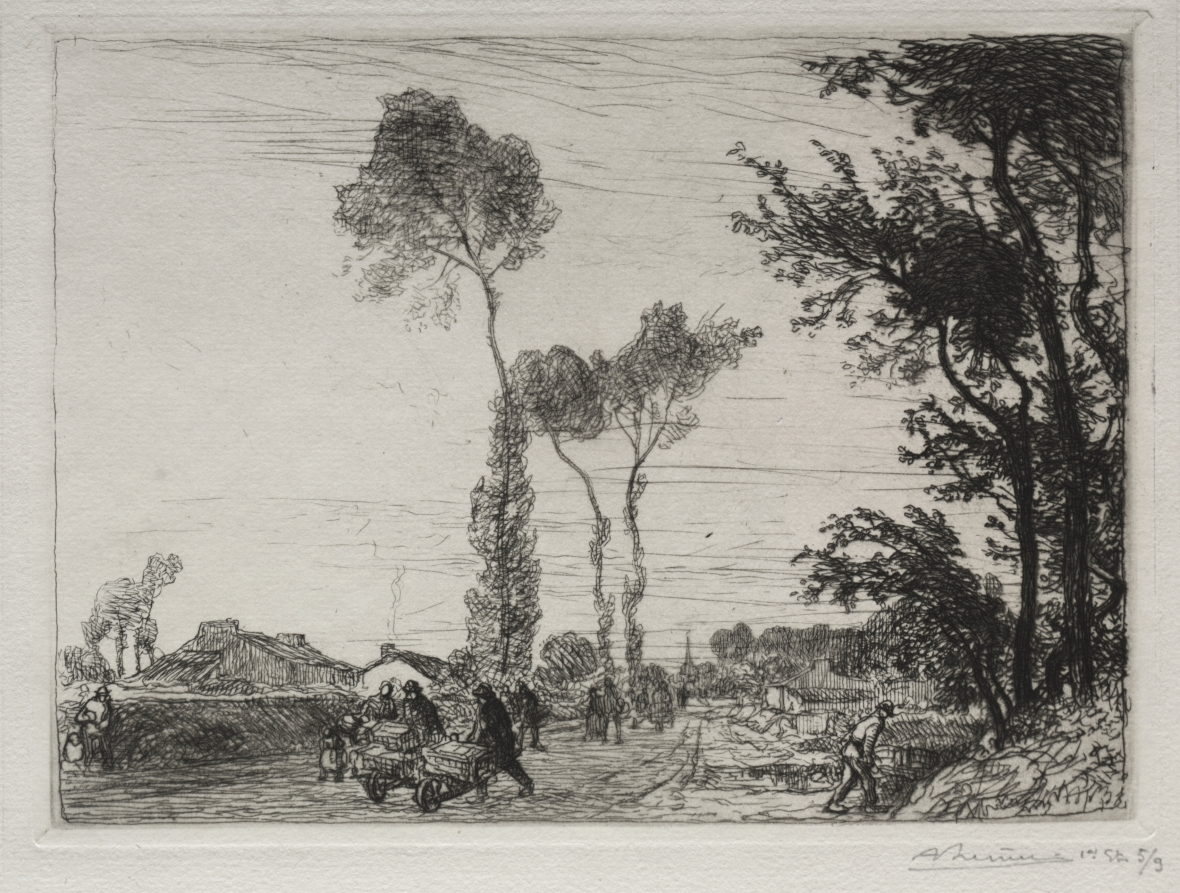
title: Retour du Marché de St. Jean-de-Mont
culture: France, 20th century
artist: Auguste Louis Lepère (French, 1849–1918)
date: 1910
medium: etching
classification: Print